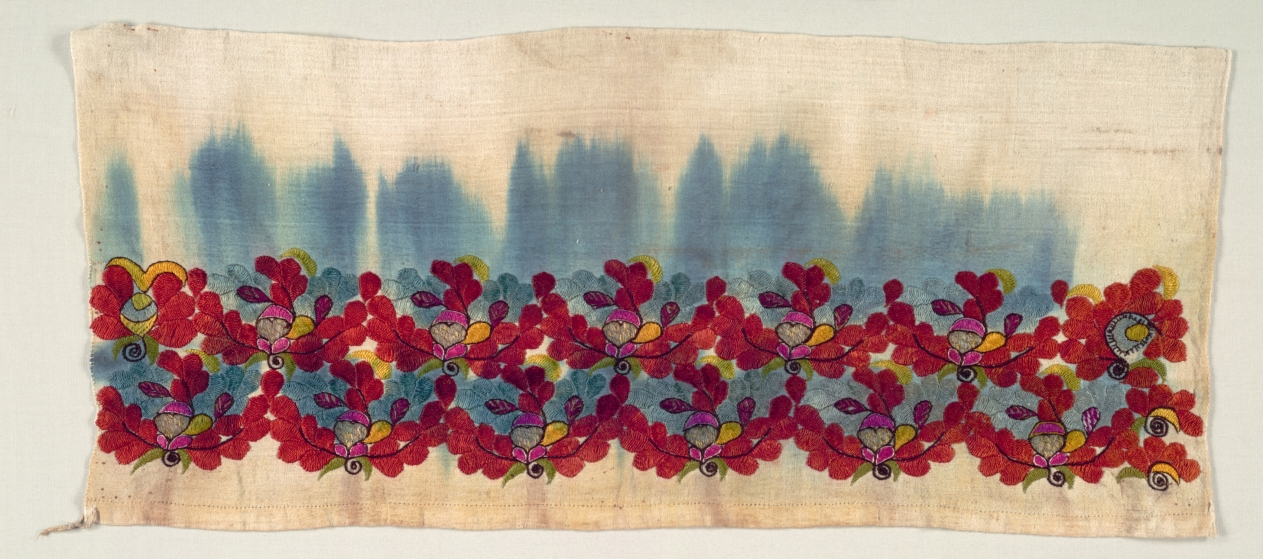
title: Embroidered Towel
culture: Turkey ?, 19th century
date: 19th century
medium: embroidery; silk and gold filé on cotton tabby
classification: Embroidery